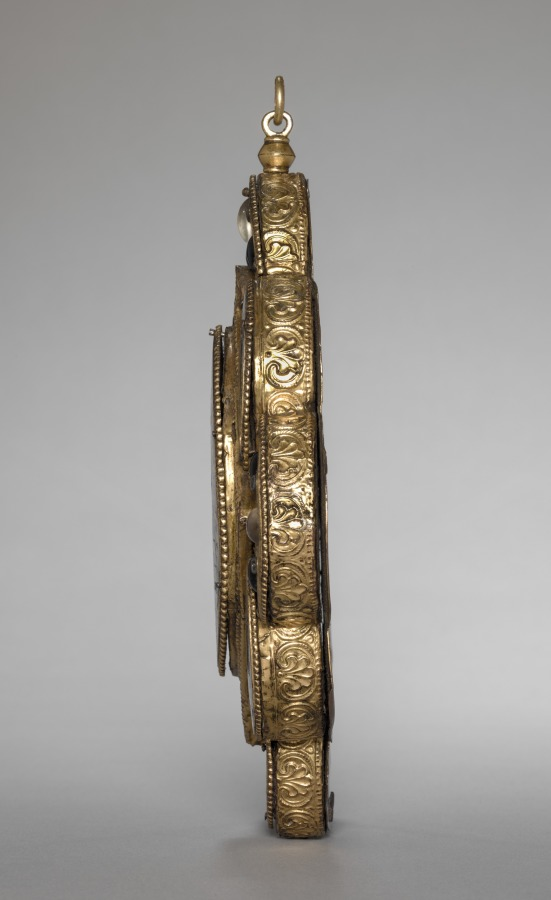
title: Pendant with the Virgin and Child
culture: Mosan, Meuse Valley, Romanesque period, 12th century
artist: circle of Godefroid de Huy (Netherlandish)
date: c. 1160–1170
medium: gilded copper, champlevé enamel; the reverse decorated in vernis brun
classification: Enamel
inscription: S[AN]C[T]A MARIA MATER D[OMI]NI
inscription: HVMILITAS; VIRGINITAS; MISERICORDIA; PIETAS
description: This pendant was made in the Rhine-Meuse region—now in modern Belgium—renowned for the production of fine metalwork objects, especially enamels. An enamel plaque depicting the enthroned Virgin and Christ child dominates the pendant. Four peripheral enamels depict angelic figures representing virtues: Humility, Virginity, Piety, and Mercy, each identified by an inscription. The pendant may have been made to serve as a reliquary to house a consecrated host. The refined craftsmanship and costly materials fittingly honor these sacred remains.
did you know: The outer lobes contain cabochons, gemstones that have been shaped and polished resulting in a rounded top and flat bottom, of garnet, glass, and quartz.